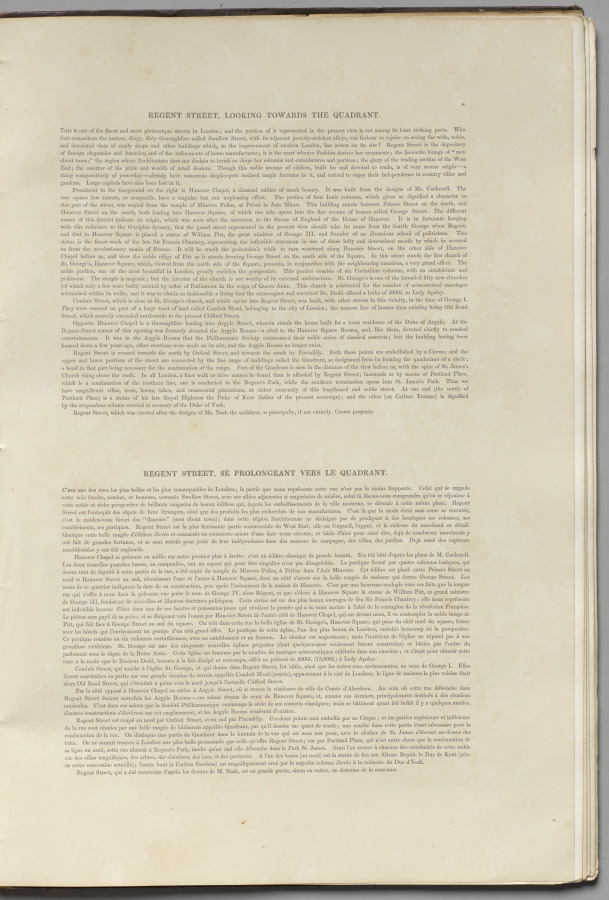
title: London As It Is: Regent Street, looking towards the Quadrant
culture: England, 19th century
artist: Thomas Shotter Boys (British, 1803–1874)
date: 1842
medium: lithograph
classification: Bound Volume